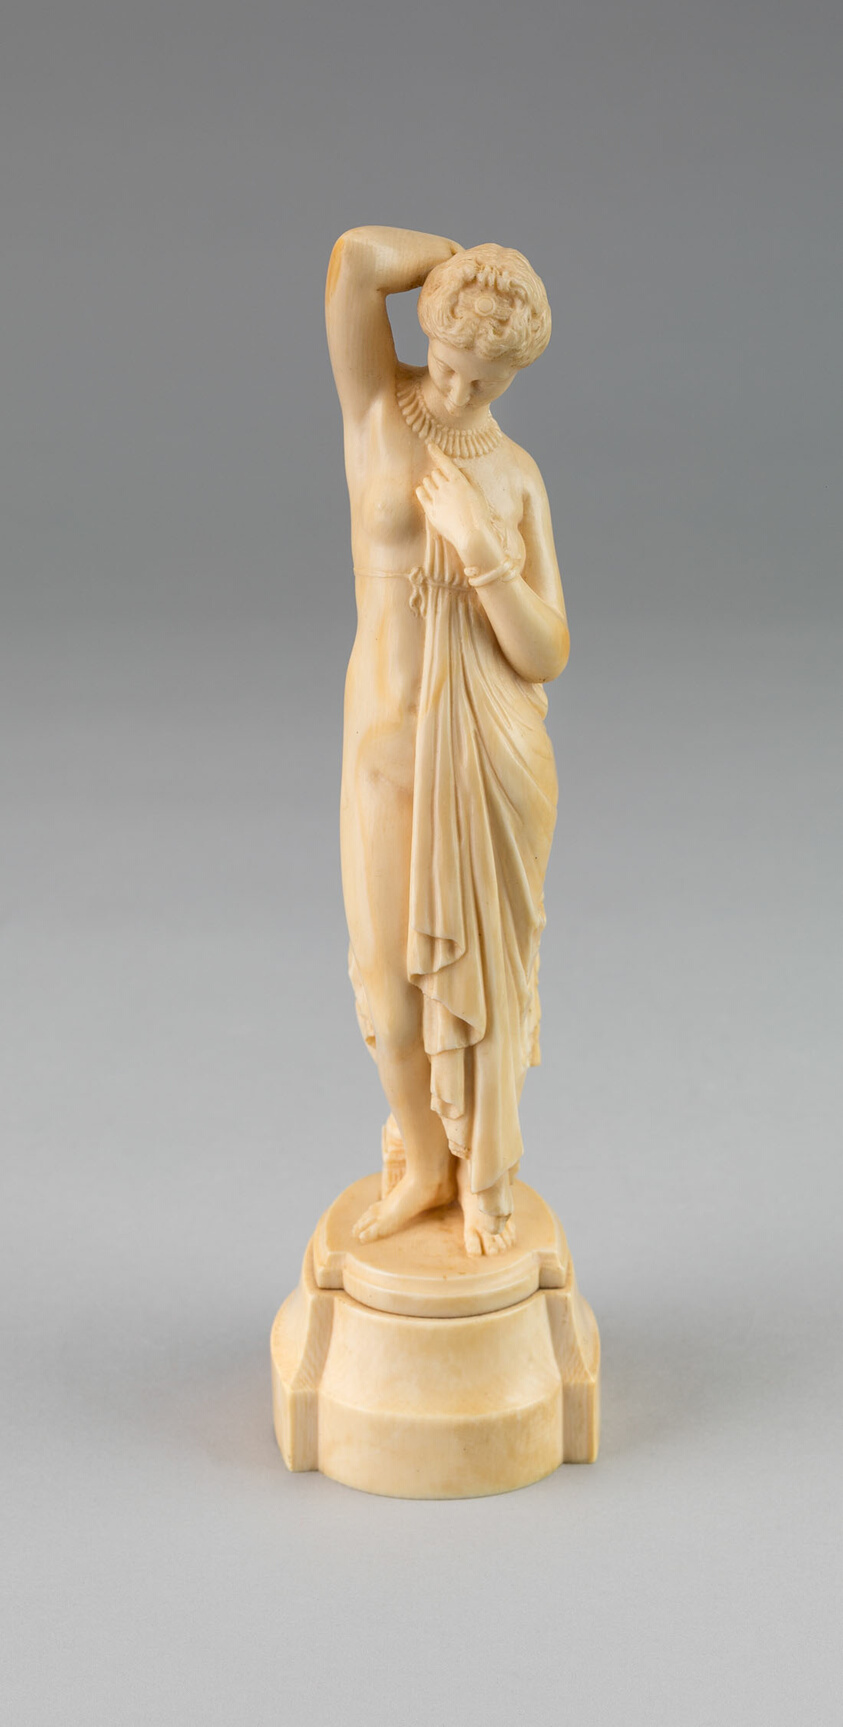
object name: Sculpture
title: Figure of Phryne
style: nineteenth century, 19th century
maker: Attributed to Jean-Jacques Pradier (French, 1792–1852)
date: c. 1845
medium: Ivory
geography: France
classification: statuette; sculpture; french; figure; ivory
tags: Greek mythology, cloth, fabric, figure, Greece, mythology, nobility, nudes, textile, woman